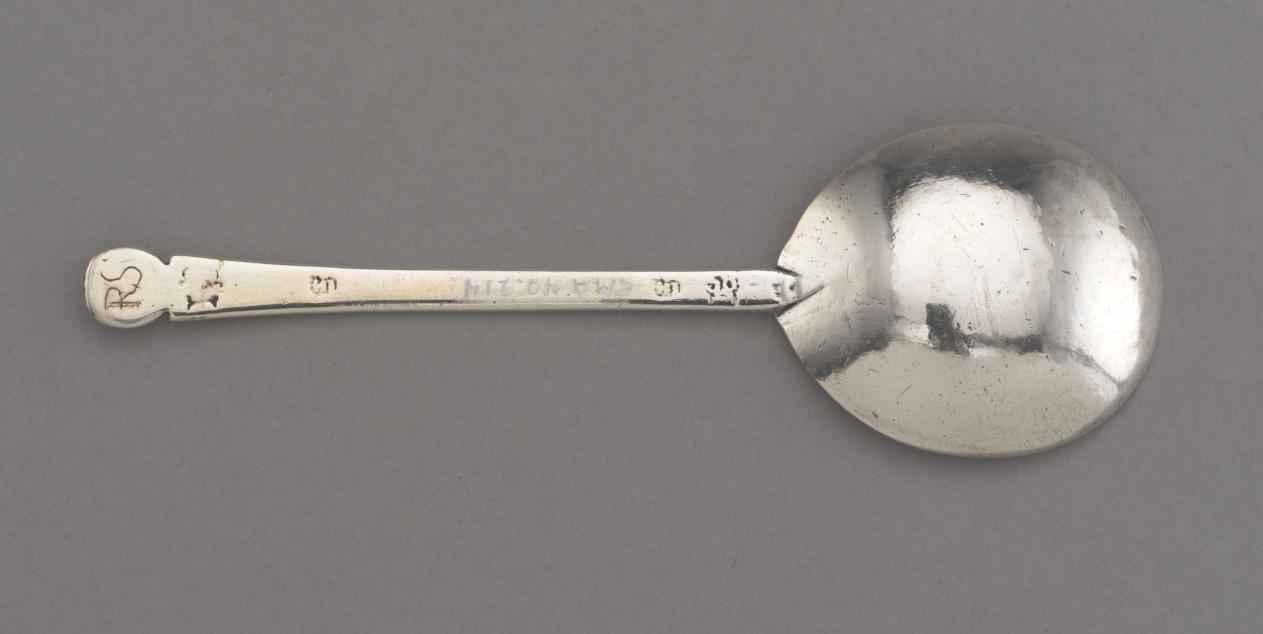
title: Spoon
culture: America, Massachusetts, Boston, 17th century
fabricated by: John Hull (American, 1624–1683)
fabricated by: Robert Sanderson (American, 1609–1693)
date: 1661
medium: silver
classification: Silver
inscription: engraved: 1661 over block initials RB on top of handle end, and block initials RS over IS (perhaps IB) on back of handle end.